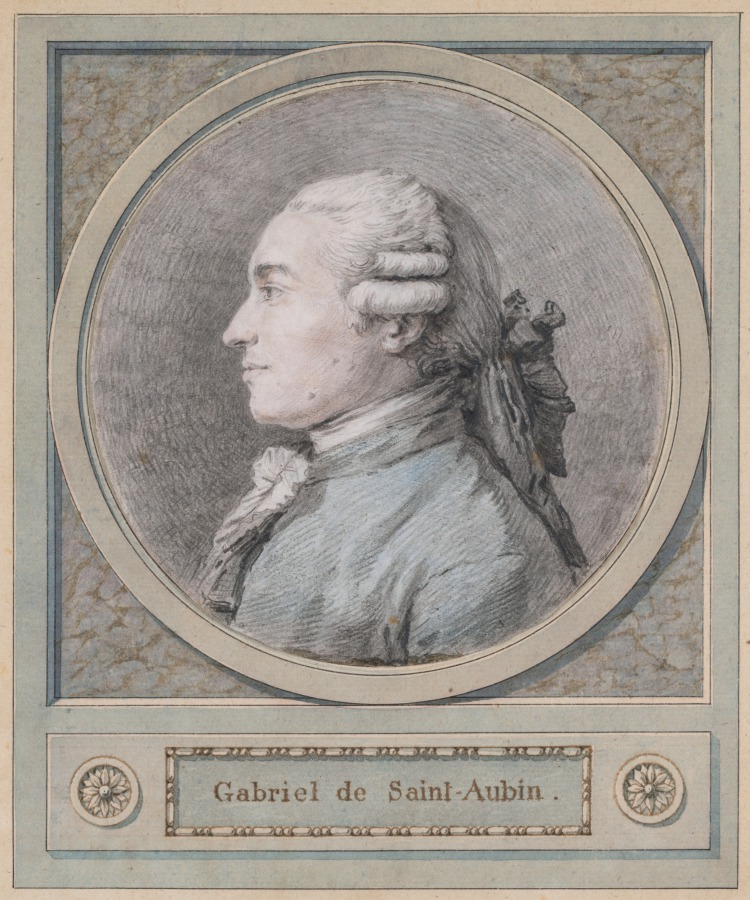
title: Portrait of a Man, said to be the Sculptor Clodion (1738–1814)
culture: France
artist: Unknown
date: late 1700s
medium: Black chalk with stumping and red and blue chalks; frame details in pen and brown ink and blue washes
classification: Drawing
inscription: lower center, in brown ink: Gabriel de Saint-Aubin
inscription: verso of second sheet of laid paper: upper left, in graphite: 2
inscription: Watermark: upper center of second sheet: crowned armorial over D&C Blauw (partial)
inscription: verso of original backing: faded brown label, printed with hand written black ink notations: VENTE 6 MARS 1898 SAINT AUBIN / (GABRIEL DE) / 97.— Portrait presume de Claude-Michel, dit Clo- / dion, célèbre sculpteur né a Nancy / Buste un médaillon, de profile a gauche. Costume / à jabot, perruque nouée derrière par un ruban / Superbe dessin à la pierre noire rehaussé de blanc et / très légèrement relevé d’aquarelle. / Cadre ancien Louis XVI, en bois sculpture et doré / Médallion rond diam 14 / Dacier No 290; yellow label with engraved designs: MARIUS PAULUME / Estamper, Dessins, Miniatures / TABLEAUX / Curiosities & Objets d’Arts / Encadrements / 10. Rue Chauchat. 10 / PARIS / Anciennement 13 Rue Royale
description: This portrait is presumed to represent the French sculptor Clodion (1738-1814). He is depicted as a nobleman, wearing a suit with a ruffled collar and a wig tied with a ribbon. The medallion format and use of color in this drawing recall painted portrait miniatures, an art form that reached the height of its popularity in the 18th century.